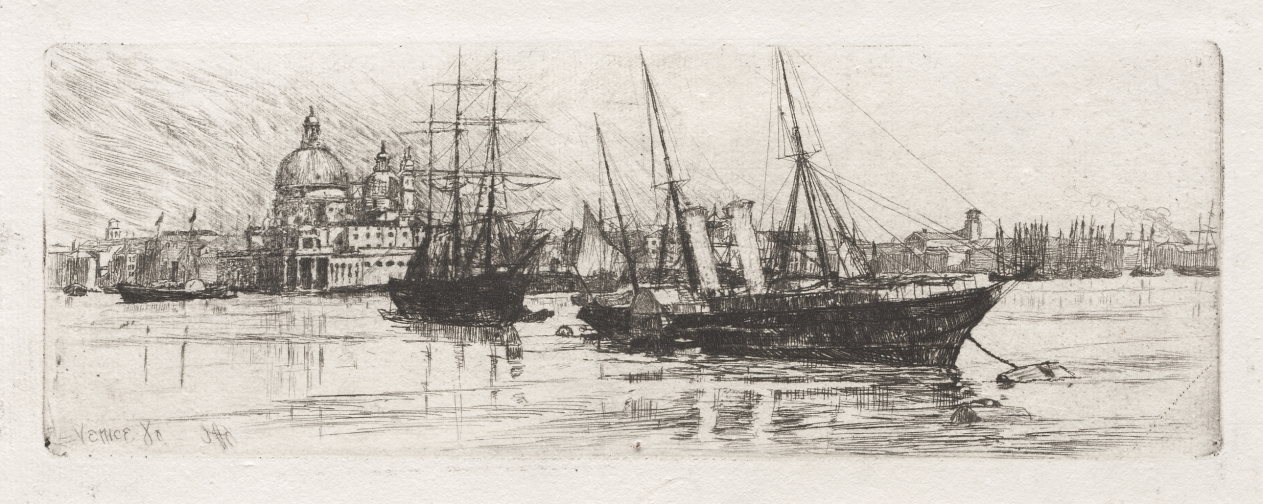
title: Two Boats, Venice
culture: America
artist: Otto H. Bacher (American, 1856–1909)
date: 1880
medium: etching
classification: Print